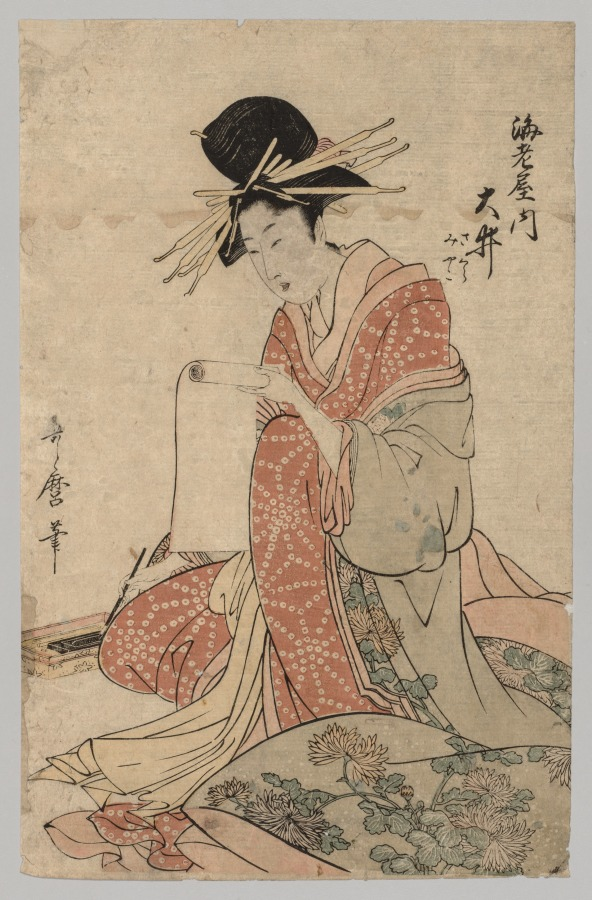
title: Woman of the Yoshiwara Reading Scroll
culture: Japan, Edo period (1615–1868)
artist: after Kitagawa Utamaro (Japanese, c. 1754–1806)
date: 1753–1806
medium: color woodblock print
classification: Print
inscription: Signature: Utamaro fude